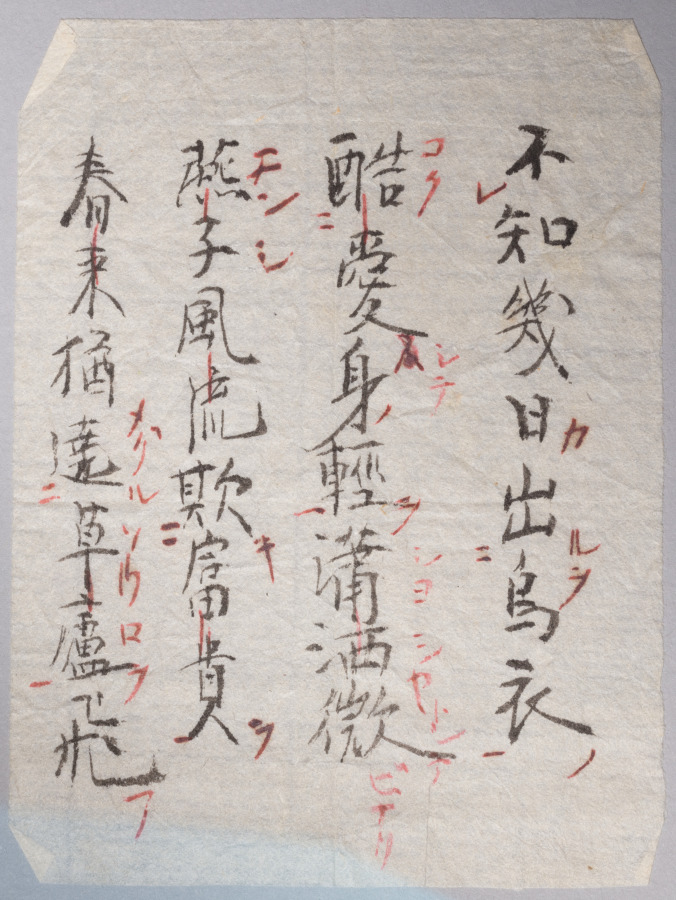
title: Calligraphy with Willow and Swallows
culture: Japan, Muromachi period (1392–1573)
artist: Ikkyū Sōjun (Japanese, 1394–1481)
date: 1400s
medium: hanging scroll, ink on paper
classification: Painting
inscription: How many days has it rid itself of the crow’s cloth? It knows not!/ Lovely is its body so nimble and neat./ Neither men of wealth, courtly position, or power can come close to the unfettered, noble swallow!/ With the coming of spring, it seems to be flying about, dancing around the grass hut of the foolish Priest. signed: Unkasō Isshi Tōkai jun Ikkyū shi ga ippitsu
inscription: outer box inscribed: Ikkyū Ōshō Enshi-zu Jigasan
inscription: inner box side lid inscribed: Showa 50 (1975), November by Tayama Honan with kao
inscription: Inner box side lid inscribed: Ikkyū Ōshō Bokuseki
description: The famed Buddhist monk Ikkyū is best remembered for his calligraphy. Calligraphic conventions of his time called for brushwork that did not vary much in style from character to character. However, as Ikkyū’s lines progress, his brushwork wanders between standard script and a sort of shorthand, marked by an uneven distribution of ink and a reduction of the characters to only the most necessary strokes. Ikkyū’s direct communication of emotion via brushwork became characteristic of the works produced by monks affiliated with the temple Daitokuji later in the Edo period (1615–1868).